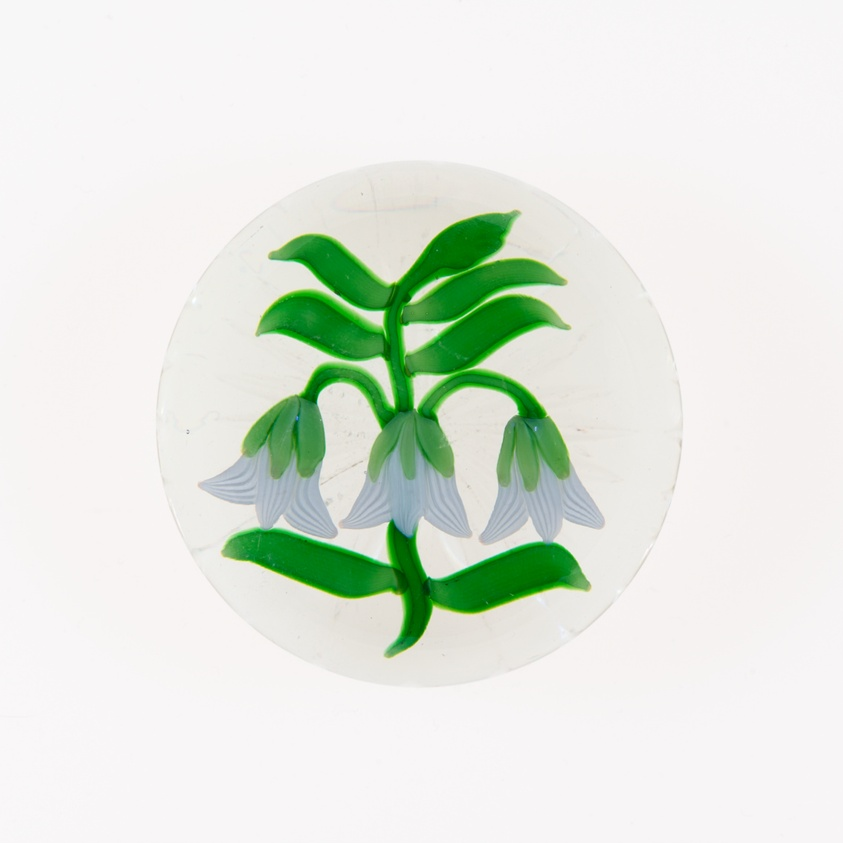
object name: Glass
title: Paperweight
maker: Baccarat Glassworks (Cristalleries de Baccarat); Lorraine, France, founded 1764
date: c. 1845/60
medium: Glass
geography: France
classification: paperweight; glass